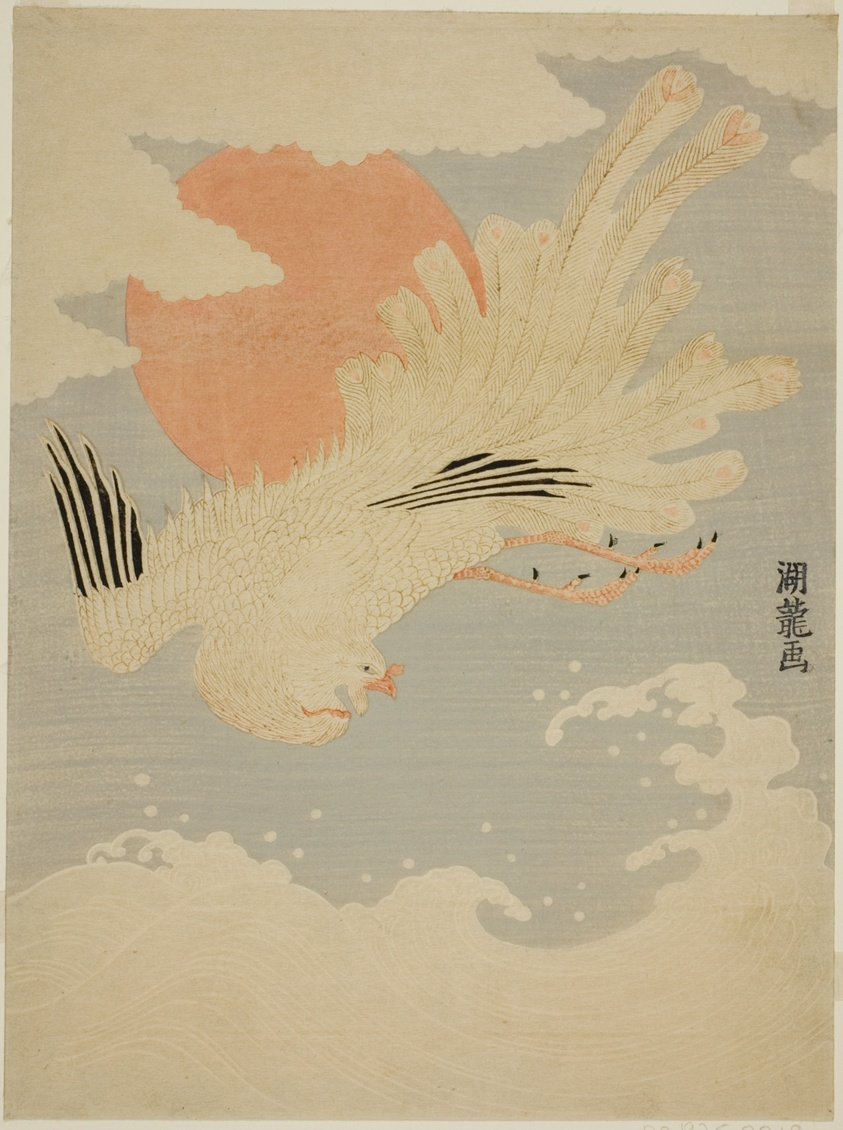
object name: Print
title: Phoenix Flying Over Waves in front of Morning Sun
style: Japanese (culture or style)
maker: Isoda Koryusai (Japanese, 1735-1790)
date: c. 1772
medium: Color woodblock print; chuban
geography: Japan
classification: woodblock print; print; asian art